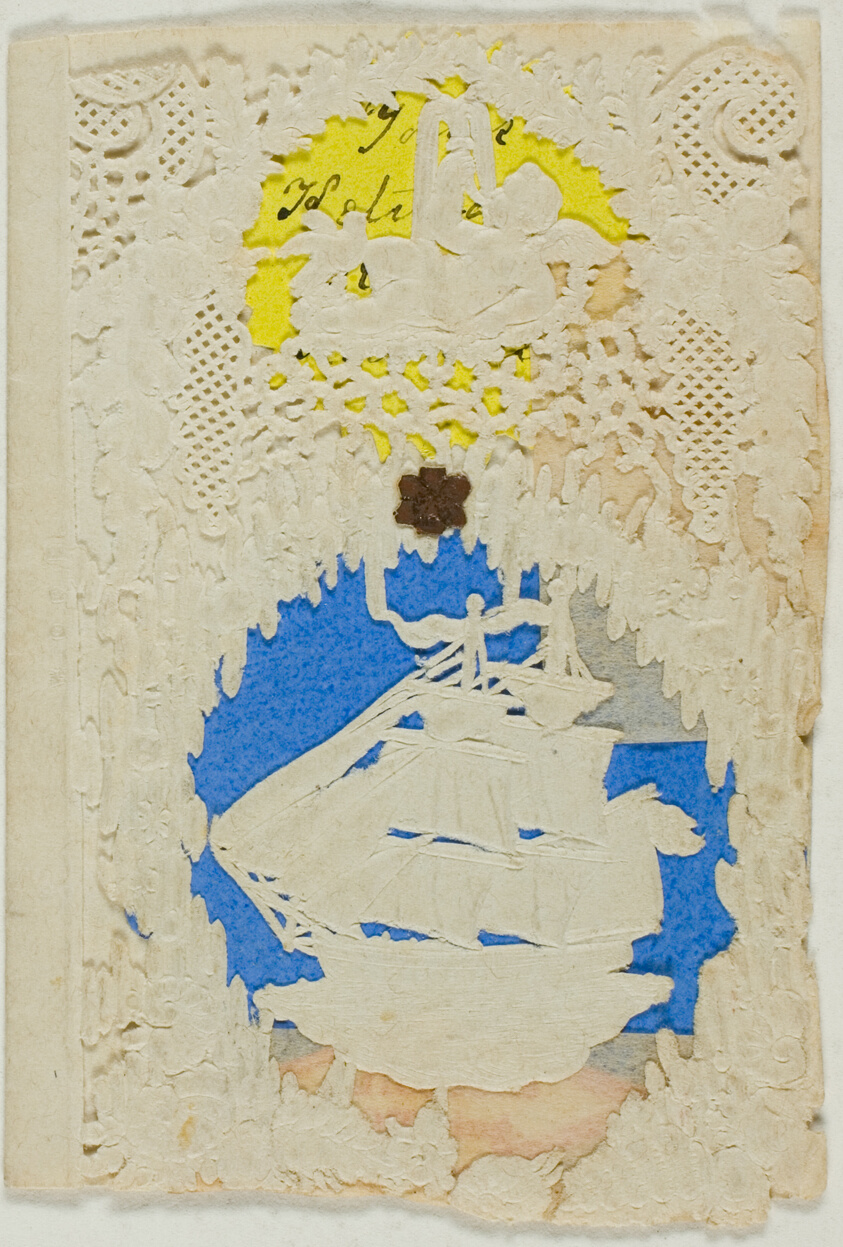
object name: Drawing and Watercolor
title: Yours Keturah Keziah Kornwellis (valentine)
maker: Unknown Artist; American or English, 19th century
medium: Cut and embossed ivory wove paper (designed) with collaged elements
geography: United States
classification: valentine; prints and drawing; paper